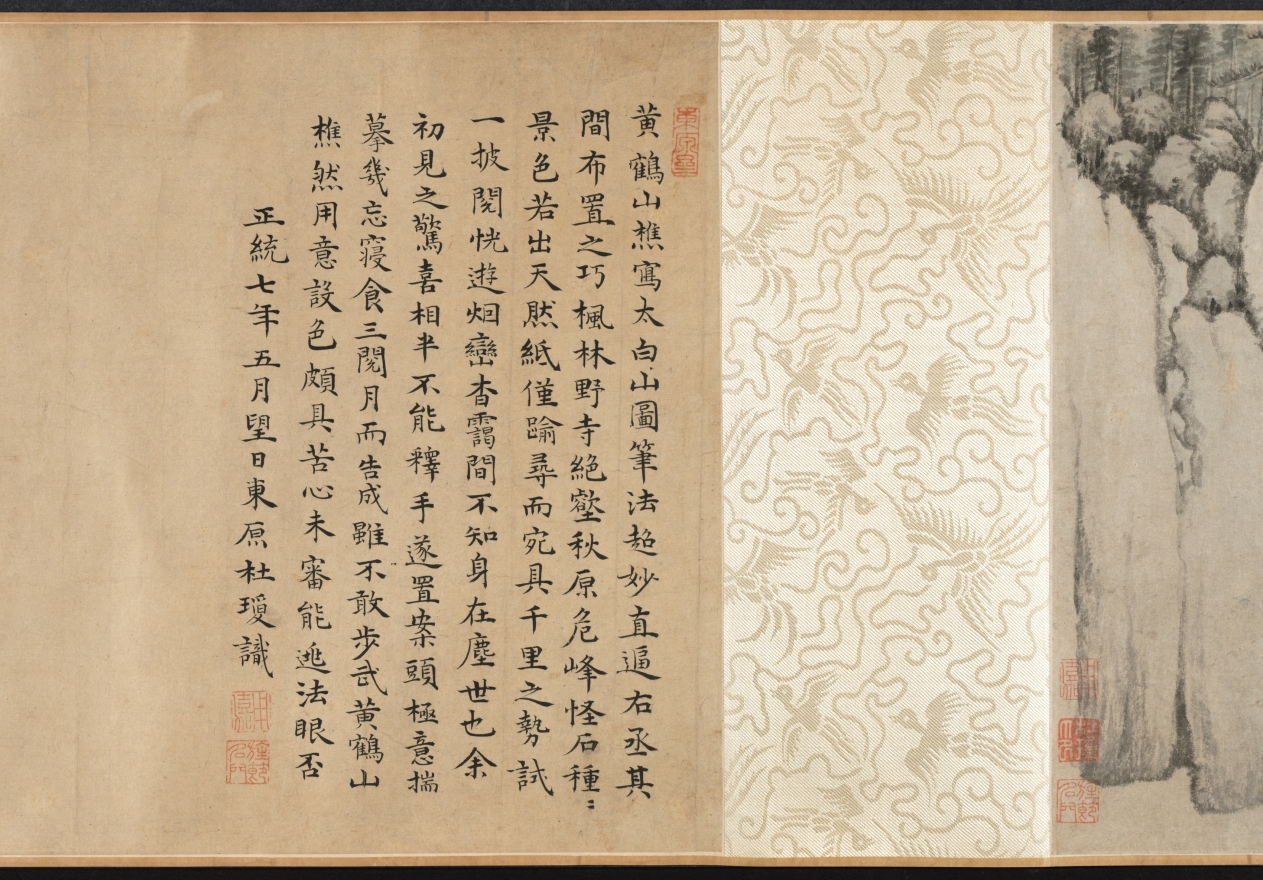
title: Mt. Taibo in the Style of Wang Meng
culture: China, Ming dynasty (1368–1644)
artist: Du Qiong (Chinese, 1396–1474)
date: 1442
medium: handscroll; ink and light color on paper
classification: Painting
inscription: Artist's inscription, signature, and 11 seals: [1 seal] Tung-yüan chai. Huang-ho-shan-ch'iao [Wang Meng] painted a painted called T'ai-po Mountain. Its brushwork is superior and admirable, which is very close to Yu-ch'en [Wang Wei, 699-759]. The cleverness of its composition, the maple groves and rustic temples, the inaccessible ravines and autumnal plateaus, the periolous peaks and strange rocks, etc., all seem to be so natural. The paper is only a little over eight feet, but the landscape has the range of a thousand miles. Once you open and note the contents, it is as if one were roaming among the mountain peaks enveloped in mist and clouds, and forgot the dusty world. When I first saw this, I was so mixed with excitement and joy that I could not take my hands off the painting. So I put it on the table, and tried my best to imitate it, forgetting sleeping and eating for about three months before it was completed. Although I do not dare to tread in the footsteps of Huang-ho shan ch'iao, I took great pains to capture his spirit in composition and colors. I do not know whether it would pass the judgment of the experts. On the fifteenth day of the fifth month, the seventh year of the Cheng-t'ung year [1442], inscribed by Tung-yüan, Tu Chiung. [2 seals] Yung-chia; Ching-chieh ming-men. [8 seals on painting] Tung-yüan chai; Ching-chieh ming-men; Yung-chia; Tu Ch'iung yin; Tung-yüan (repeated 5 times). trans. WKH/LYSL 3 colophons and 7 additional seals: 1 colophon and 2 seals of Chou Ting (1401-1487); 1 colophon and 2 seals of Wu K'uan (1435-1504); 1 colophon, dated 1655, and 2 seals of Lan Ying (1585-after 1664).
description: When a Chinese painter "imitated" a painting by a past master, the intention was never to produce an exact copy. Du Qiong, the Ming painter from Suzhou, is a case in point. The painting style of this handscroll is actually closer to that of Huang Gongwang (1269–1354) than to the style of Wang Meng (about 1301–1385). Both masters were active during the previous dynasty and are among the so-called Four Great Masters of the Yuan dynasty (1279–1368). In this painting, the interplay of styles, including Du Qiong's own, contribute to an inner dimension that is more than visual. Mt. Taibo is located in the province of Zhejiang and is known for its scenic beauty. In this scroll, however, it is not depicted literally. The image is an ideal representation of mountains in southeastern China.